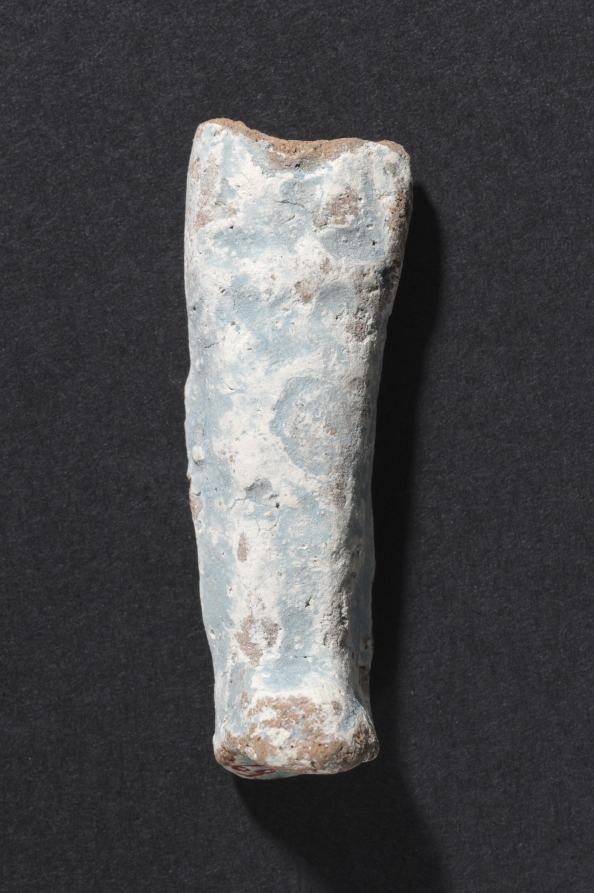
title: Shawabty of Ditamenpaankh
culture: Egypt, Late period (715–332 BCE), Dynasty 25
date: 715–656 BCE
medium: terracotta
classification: Funerary Equipment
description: High demand for shawabtys in the Late Period, a time when as many as 400 or more shawabtys were placed in the tomb with the deceased, gave rise to a specialized container for storing them: the shawabty box. This example is inscribed for the lady of the house, Ditamenpaankh, and was probably one of a pair originally made for her. The single-masted boat on the box's lid is perhaps an allusion to the pilgrimage of the deceased to the holy city of Abydos, the cult city of Osiris, king of the dead. The shawabtys inside are crude, mass-produced examples cast in an open mold. Made of terracotta, their blue paint imitates more costly shawabtys made of faience. As for the shawabty spell, it has been removed from its traditional location on the shawabty's front and relocated onto the sides of box, where it needed only to be written once, thus expediting production.